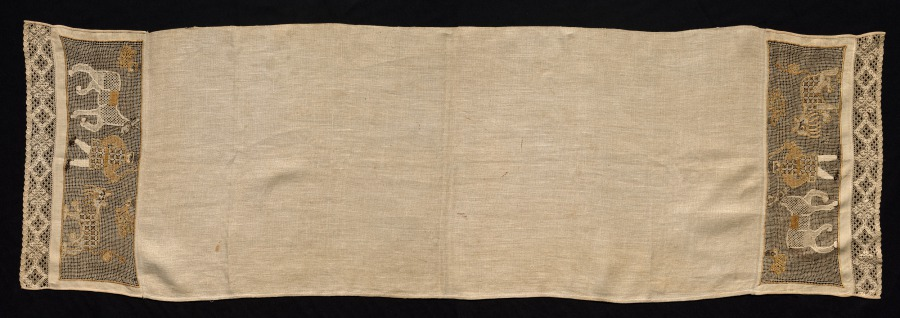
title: Towel with Border of Figures of Men and Animals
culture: Russia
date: 1700s–1800s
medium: Linen: needle lace (cutwork and drawnwork), straight (continuous) bobbin lace, tape lace edging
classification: Lace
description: On each end of this cloth is a lace border depicting a man walking with his mule and two birds flying above. The man and his mule are approached by a large feline, perhaps a panther, which is a common motif in Russian textiles. Metallic and colored silk threads are used to render the figures and create individualized details.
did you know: Handmade lace for marriage dowries was produced in large quantities in Russia during the eighteenth and nineteenth centuries.